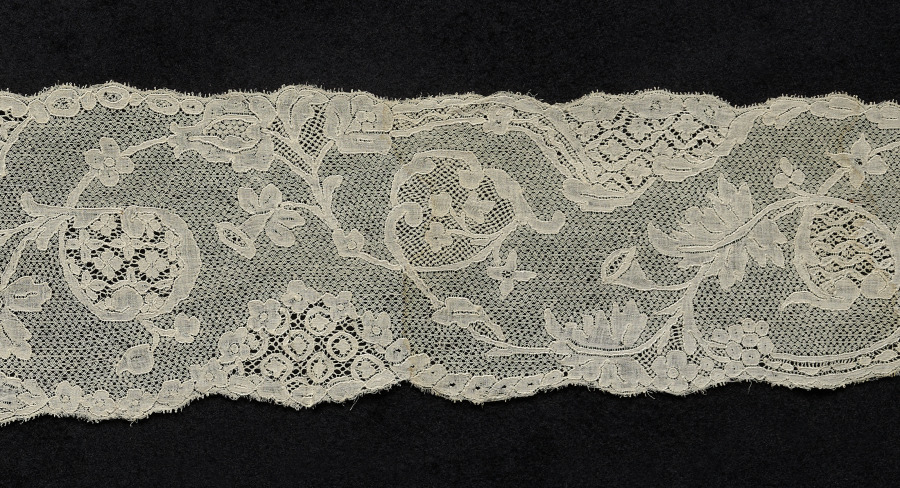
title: Lace Lappet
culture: Belgium, Mechelen(?)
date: 1740–60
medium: Linen: bobbin lace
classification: Lace